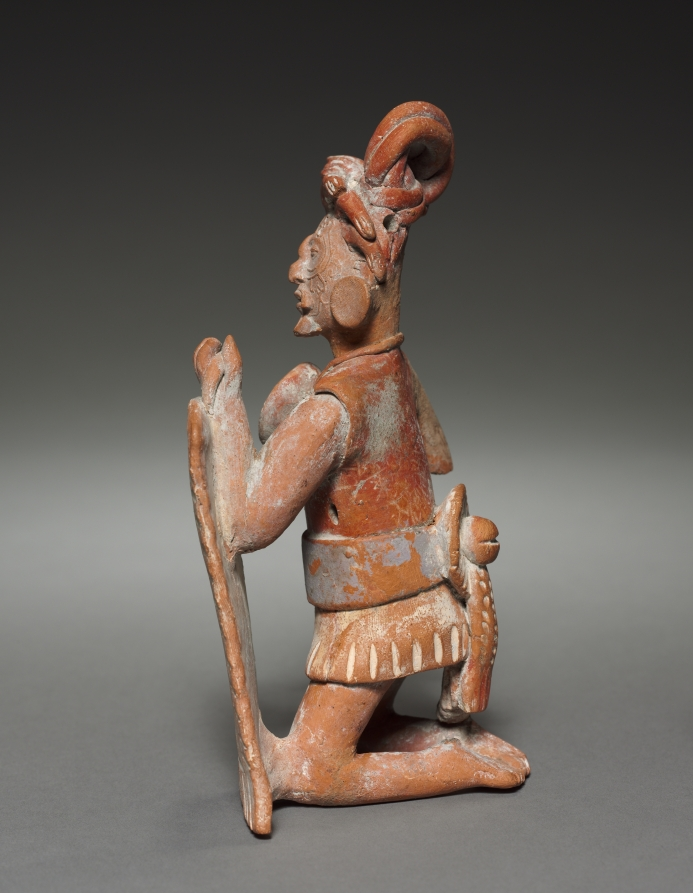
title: Warrior Figurine with Shield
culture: Mexico, Classic Maya, Jaina style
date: 600–900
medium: molded and modeled pottery with traces of pigment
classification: Sculpture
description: Maya figurines portray a wide range of human, animals, and supernatural beings. This example represents a kneeling warrior who holds a rectangular shield and wears elaborate ornaments, including huge ear spools. The expressive, delicate head was made in a mold; the body was hand modeled.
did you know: Elaborate facial tattoos and a bivalve pendent identify this warrior as a sajal, a second-tier noble.